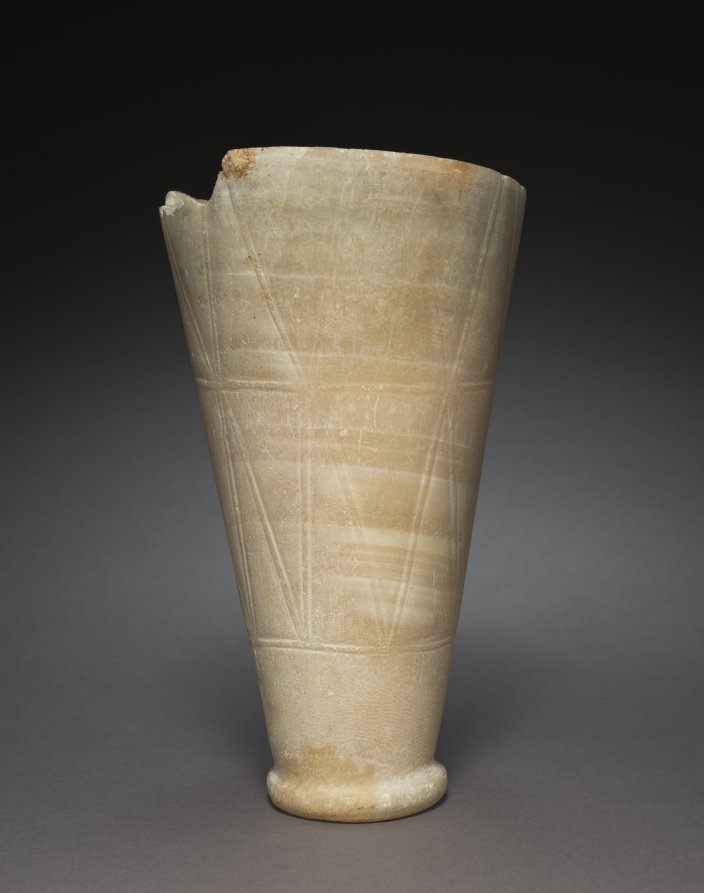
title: Tall Jar with Rope Patterns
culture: Egypt, Saqqara, north of the Step Pyramid, tomb 2305, excavations of J. E. Quibell, 1910-1911, Old Kingdom (2647–2124 BCE), Dynasty 3, reign of Djoser (c. 2650 BCE)–reign of Sneferu (2613–2589 BCE)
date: 2647–2454 BCE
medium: travertine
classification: Vessels